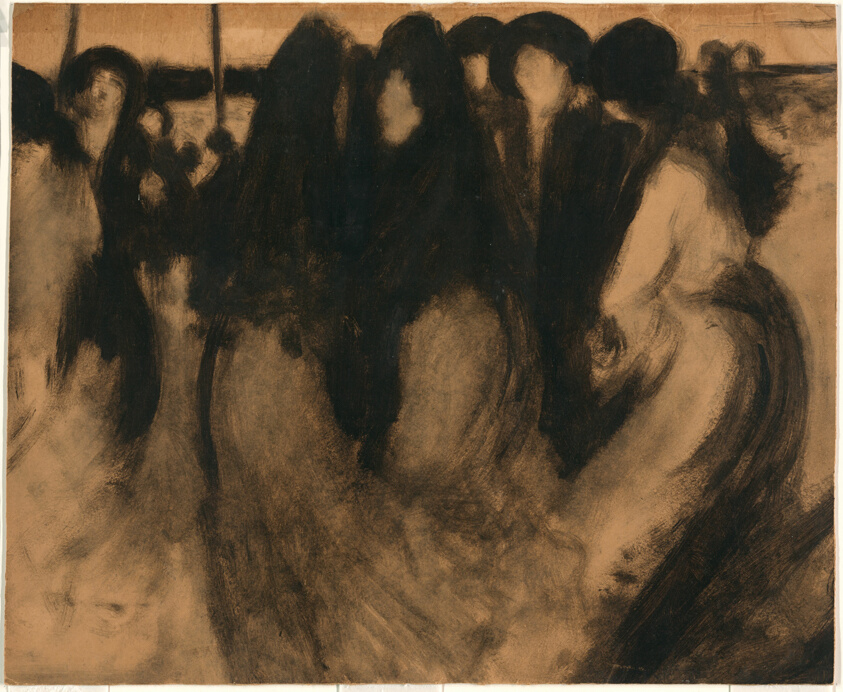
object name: Drawing and Watercolor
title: Women in Landscape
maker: Attributed to Eugène Carriére; French, 1849–1906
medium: Brush and black and brown oil paint, with gray gouache, on tan laminate board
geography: France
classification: prints and drawing; drawings (visual works)